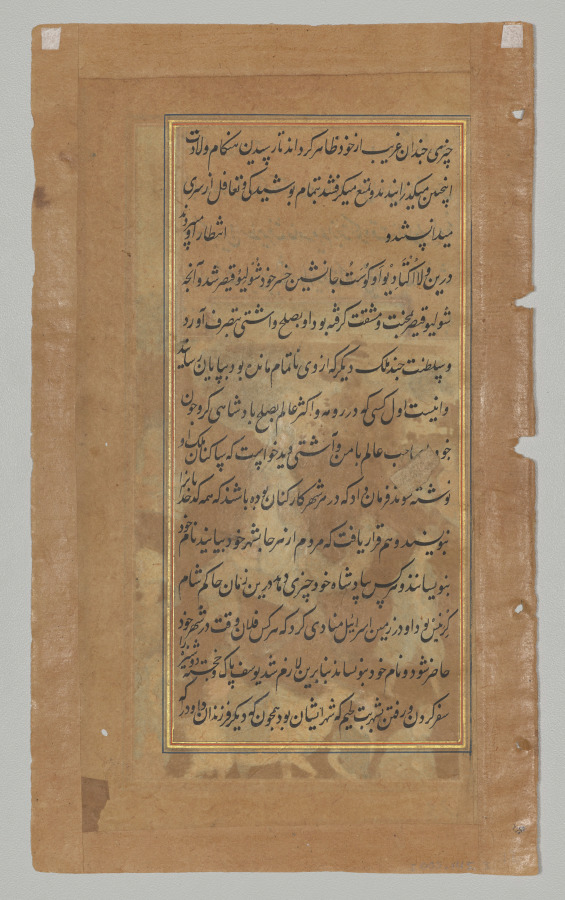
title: Mary and Joseph Travel to Bethlehem (folio 24 verso), from a Mirror of Holiness (Mir’at al-quds) of Father Jerome Xavier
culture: Mughal India, Allahabad, made for Prince Salim (1569–1627)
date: 1602–4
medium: Gum tempera, ink, and gold on paper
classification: Manuscript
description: Joseph leads the heavily pregnant Mary riding on a camel. In the text Father Jerome wrote that Mary rode a “pack beast,” so the Indian artist opted to portray her on a camel. An ox in the foreground carries their belongings, and the bent trees indicate the journey’s harsh conditions. They are on the way to Bethlehem, the city of King David, from whom Joseph was descended, in order to register for a census. Father Jerome often emphasized the royal lineage of Jesus, apparently in an effort to impress the Mughals.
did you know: Wearing a green coat, Joseph carries a sword over his shoulder, suggesting that he is ready to face any potential trouble.